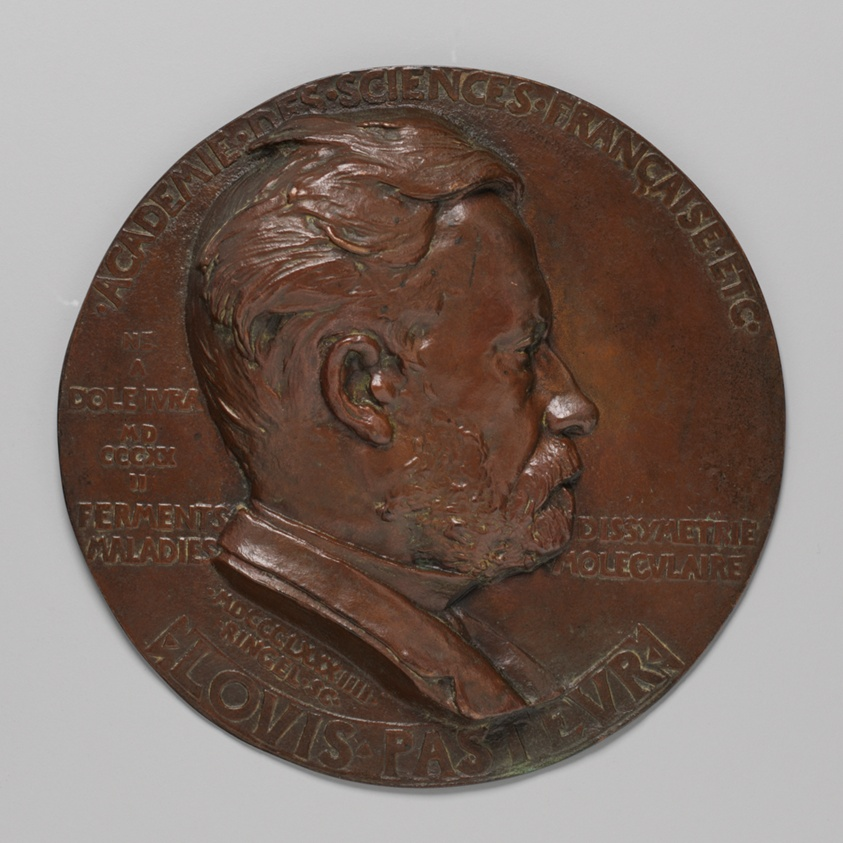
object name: Medals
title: Louis Pasteur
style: 19th century, classicism, classical revival, france, nineteenth century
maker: Jean Désiré Ringel d'Illzach (French, 1847–1916)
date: 1884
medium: Bronze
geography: France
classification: medal; medal/plaquette/coin; medallion; bronze; french; metal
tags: portrait, faces, portrait: French subject, man, portraits, portraits: male subject, profile